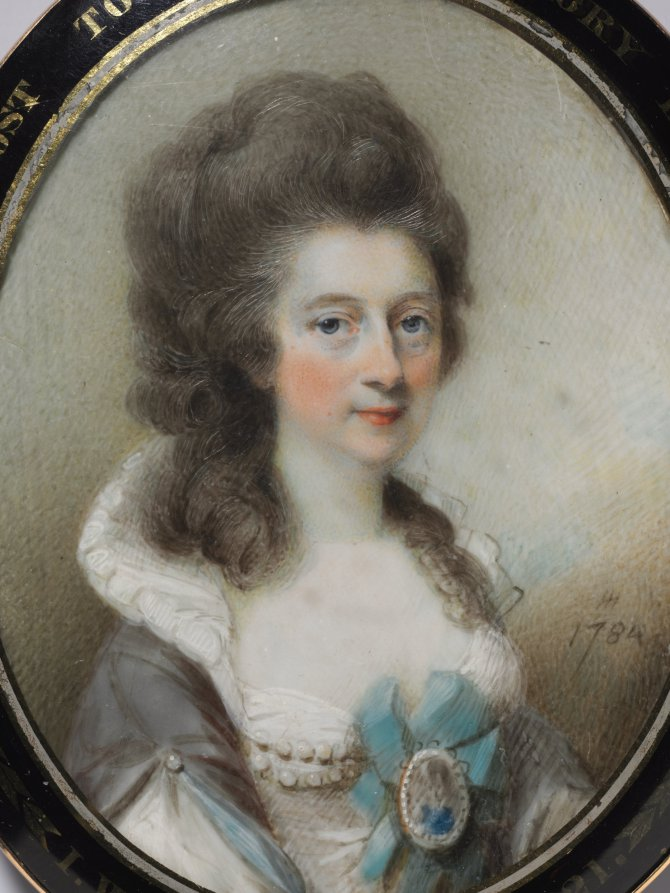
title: Portrait of Lady Grace Anna Newenham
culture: England, 18th century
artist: Horace Hone (British, 1756–1825)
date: 1784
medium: watercolor on ivory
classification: Portrait Miniature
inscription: Signed right: HH / 1784 [HH in monogram; inscribed on frame: "THOUGH LOST TO SIGHT TO MEMORY EVER DEAR. I.W. 28th NOVr 1821."]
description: Lady Grace Anna Newenham (née Burton, 1725–1807) was the wife of Sir Edward Newenham (1734–1814), a prominent radical Protestant Irish politician and MP for Dublin, whom she married in 1754 at St. Thomas in Dublin. Lady Newenham herself came from a highly influential family with deep Whig political roots in Dublin. This miniature was painted in 1784, when she was nearly 60 years old and had been married for 30 years. This period found her husband, Edward, deeply in debt, going to great lengths to secure employment for his children, and planning a trip to America. While the former conditions would not encourage an artistic expenditure, the latter might have provided the impetus for this portrait to be commissioned. Lady Newenham wears a gray wrap with a high white collar and a white low-neck dress. Her costume is summarily painted with quick strokes, and the ivory ground is allowed to show through particularly at her breast, enhancing the delicacy of her complexion. She is not, however, overly flattered as she would have been in the hands of a miniature painter like Richard Cosway (1742–1821). Instead, Horace Hone gently described her sagging jaw line as well as the wrinkles and moles on her face. She has the eyes of an older woman, beneath which Hone’s trademark glowing pink cheeks seem almost to suggest cosmetics. The texture of her lightly powdered brown hair that falls to her shoulders is delineated by Hone’s technique of scraping the surface of the watercolor paint with extremely fine lines that reflect light and suggest individual strands of hair. The background is a muddy gray sky with a hint of pale blue. Among the 18 children that Lady Newenham gave birth to over the course of two decades, six died at a young age. Lady Newenham wears a miniature on her breast, possibly depicting one of the children she lost. The back of the miniature contains plaited hair under glass, bordered with an elaborate woven hair “belt,” a typically Irish form of hairwork.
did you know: Human hair was frequently incorporated into miniatures and was especially appropriate for mourning miniatures because it transformed the object into a kind of reliquary.